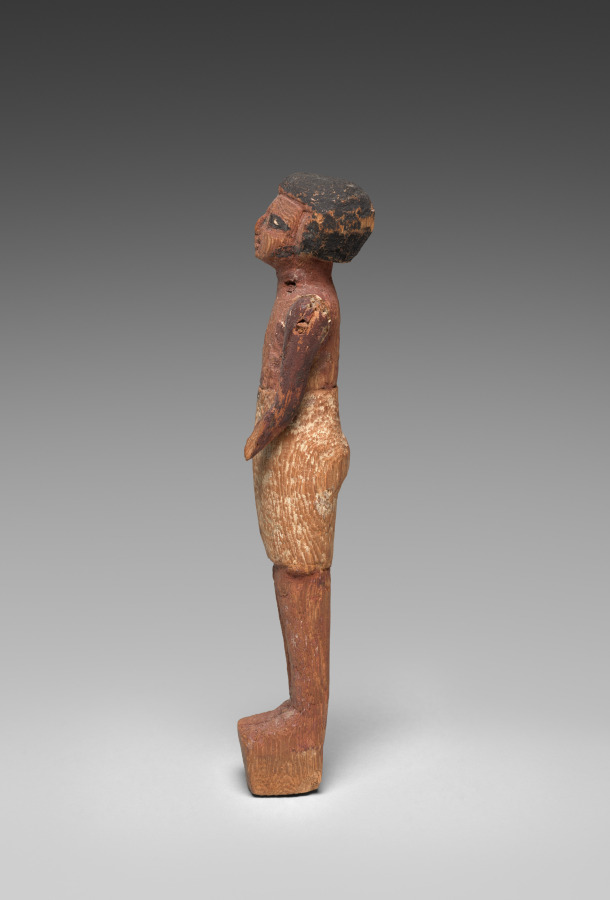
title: Model Figure of a Man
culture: Egypt, Middle Kingdom (2040–1648 BCE), Dynasty 12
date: 1980–1801 BCE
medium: painted wood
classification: Funerary Equipment